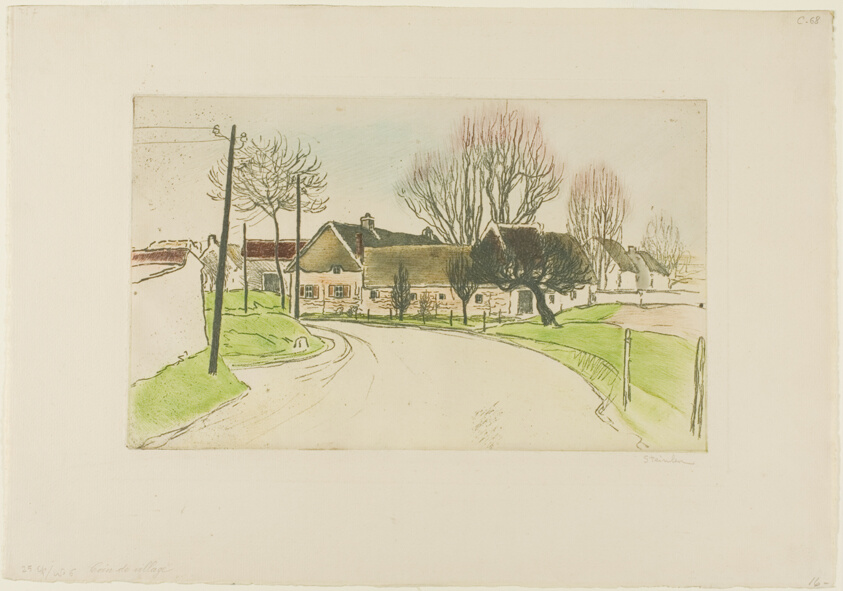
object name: Print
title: The House on the Edge of the Village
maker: Théophile-Alexandre Steinlen; French, born Switzerland, 1859-1923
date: 1902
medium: Soft ground etching, drypoint and aquatint from two plates printed in 6 colors (green, brown, red-pink, blue, ochre and black) on ivory laid paper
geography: France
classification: etching; print; prints and drawing